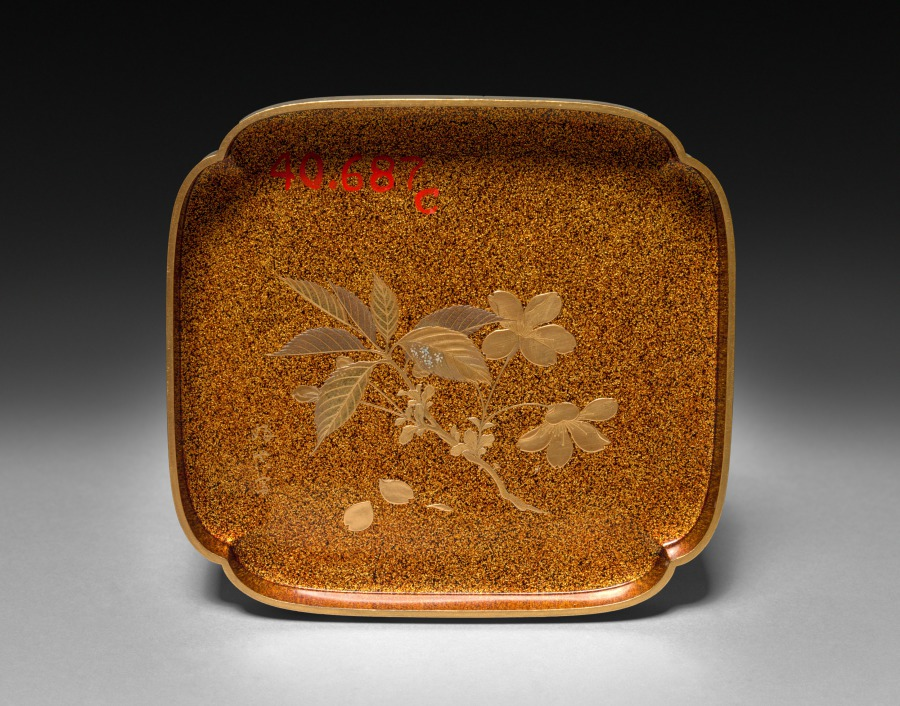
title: Box (lid)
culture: Japan, Meiji period (1868–1912)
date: late 1800s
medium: wood with lacquer and gold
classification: Lacquer